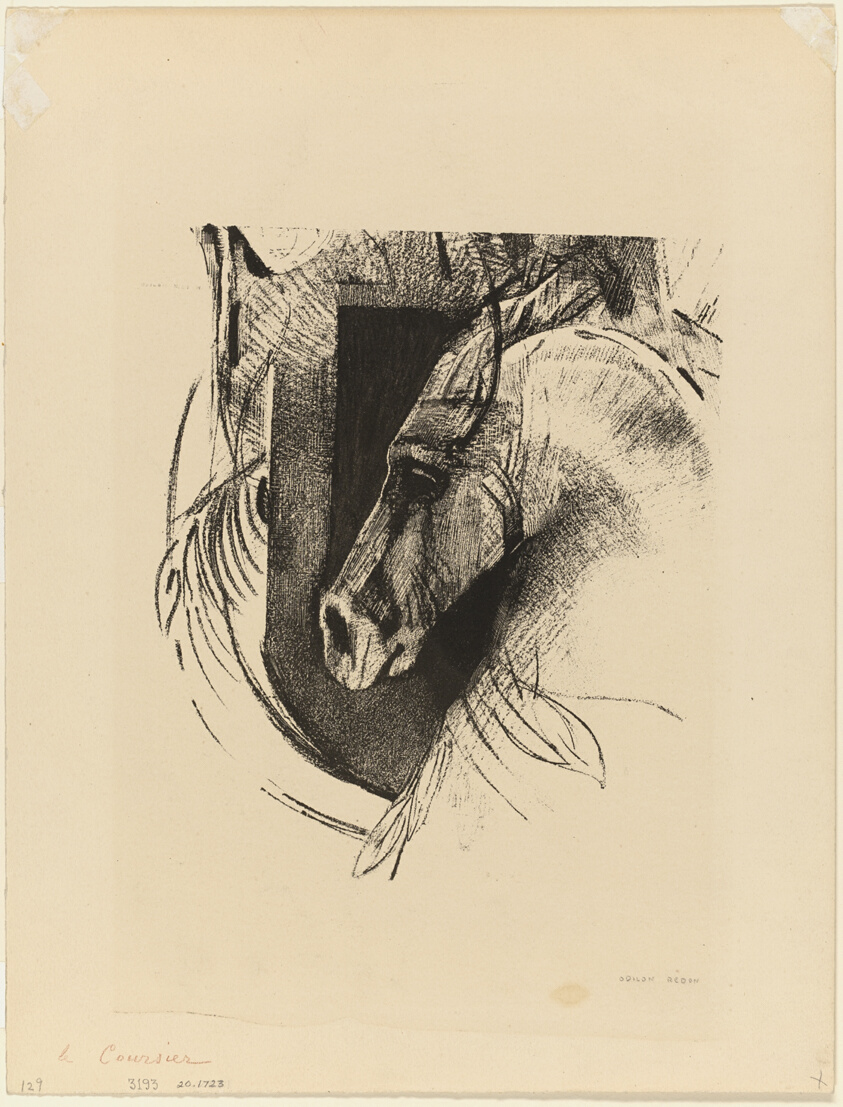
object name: Print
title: The Charger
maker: Odilon Redon (French, 1840-1916)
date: 1894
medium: Lithograph in black on heavy cream wove paper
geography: France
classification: lithograph; print; prints and drawing; paper